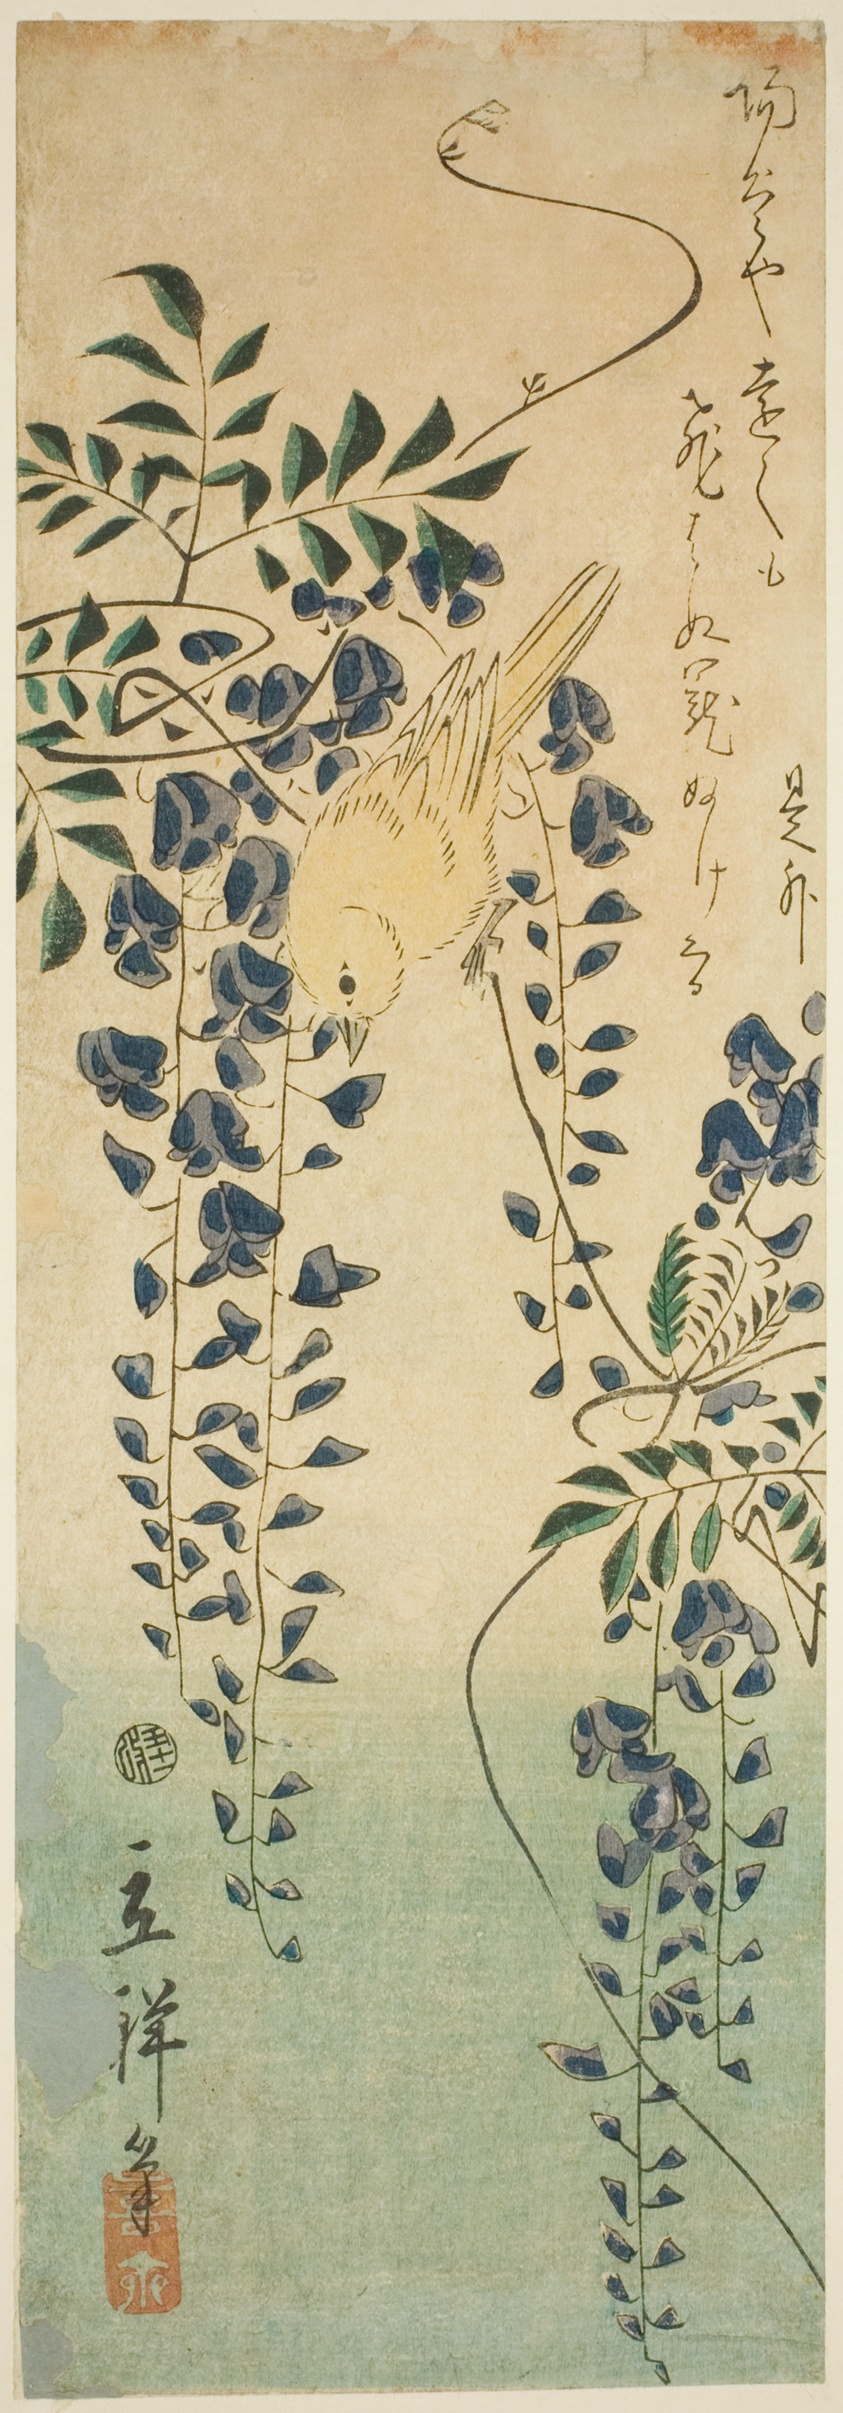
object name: Print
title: Canary and wisteria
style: Japanese (culture or style)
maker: Utagawa Hiroshige II (Shigenobu) (Japanese, 1826–1869)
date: 1865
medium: Color woodblock print; chutanzaku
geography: Japan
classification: woodblock print; print; asian art